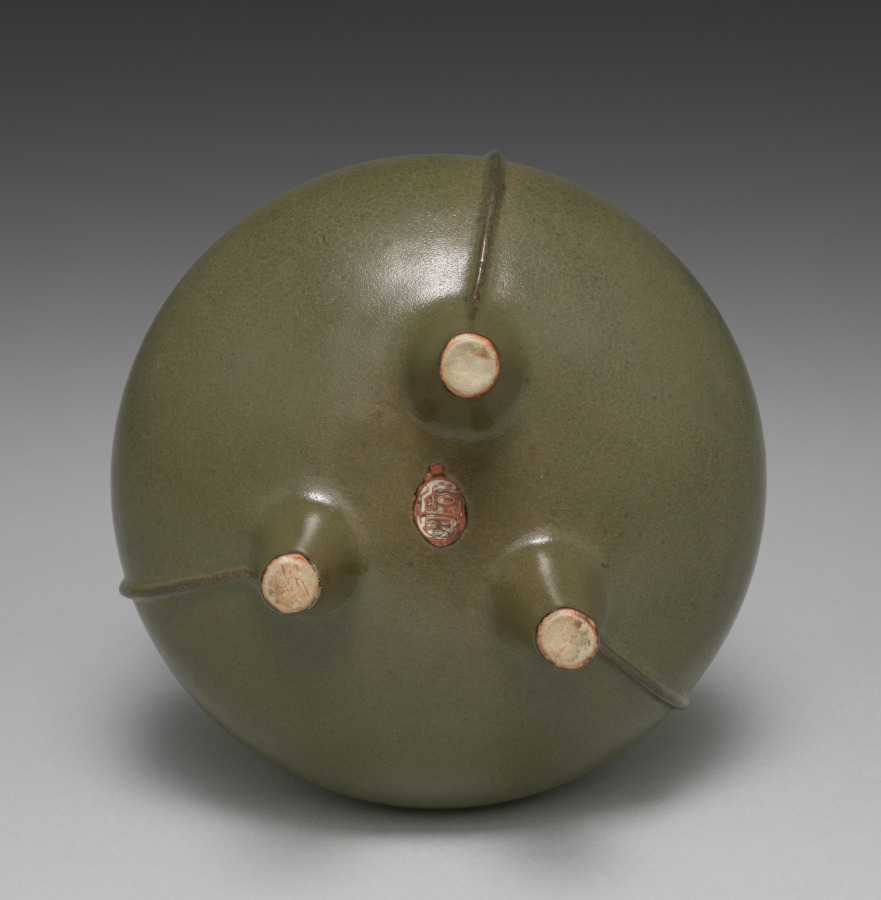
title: Incense Burner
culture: Japan, Meiji period (1868–1912)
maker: Seifū Yohei III (Japanese, 1851–1914)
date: 1895–1914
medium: Porcelain with tea-leaf colored glaze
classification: Ceramic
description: Kyoto-based Japanese ceramist Seifū Yohei III (1851–1914) admired the glaze colors found on Chinese porcelain and tried to replicate them through intensive experimentation. His green and creamy white glazes were particularly well received. The combinations of colors with subtle molded and incised decorations in his ceramics respond powerfully to changes in light, creating a dynamic viewing experience. Names for the glazes, written in ink with a brush on the lids of the custom-made storage boxes for the works, often indicate a specific glaze or ware that had inspired him, even when the resulting color was distinctively his own.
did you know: This globular incense burner has a tea leaf colored glaze and linear molded decorations running around the base of the collar and down the legs.